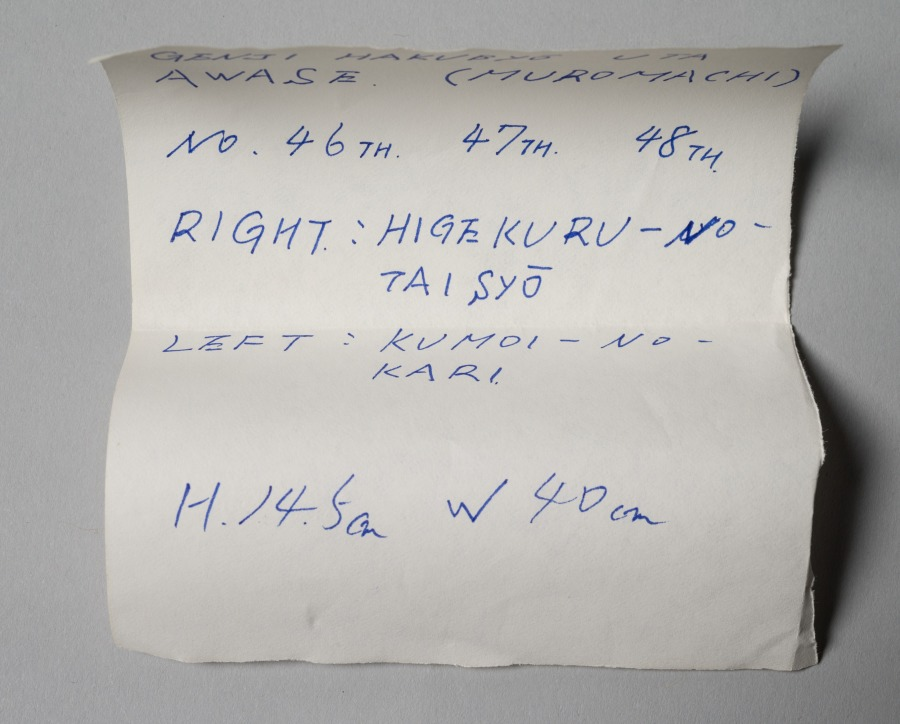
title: Section of an Illustrated Tale of Genji Poetry Contest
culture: Japan, Muromachi period (1392–1573)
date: 1400s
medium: section of a handscroll mounted as a hanging scroll; ink on paper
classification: Painting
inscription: 四十六番 左 ひげくろの大将 心さえ空にみだれし雪の［も」夜に ひとりさえつるかたしきの袖／ 四十七番 うきことを思ひさわ げばさまざまに くゆるけむりぞ いとど たち そふ／ 四十八番 すがくれてかず にも あらぬ かりのこを いづかたにかはとりかくすべき／ 右 雲井のかり かぎりとてわすれがたきを わするるも こや世に なびくこころな るらむ／ あさきなを いひ ながしける かわ ぐちは いかが もらしし せきのあらがき／ あわれをもいかに しりてか なぐさ めむ あるや 恋しき なきや かなしきに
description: This hanging scroll was once part of a handscroll depicting a waka (thirty-one syllable verse) poetry contest between characters from the 11th-century literary classic Tale of Genji. In this section, a woman known informally as Kumoi no kari, or “Goose in Fog,” after a lovelorn line she hums in the novel, is pitted against Higekuro no taishō, or “General Blackbeard.” Three of his poems, numbered 46 to 48, from “The Handsome Pillar” chapter appear over his image. The subsequent three poems inscribed above Kumoi no kari are presented as her “responses,” and come from "The Plum Tree Branch", “New Wisteria Leaves”, and "Evening Mist" chapters.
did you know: General Blackbeard laments having smelly ash poured upon him by his angry wife in one of the poems.